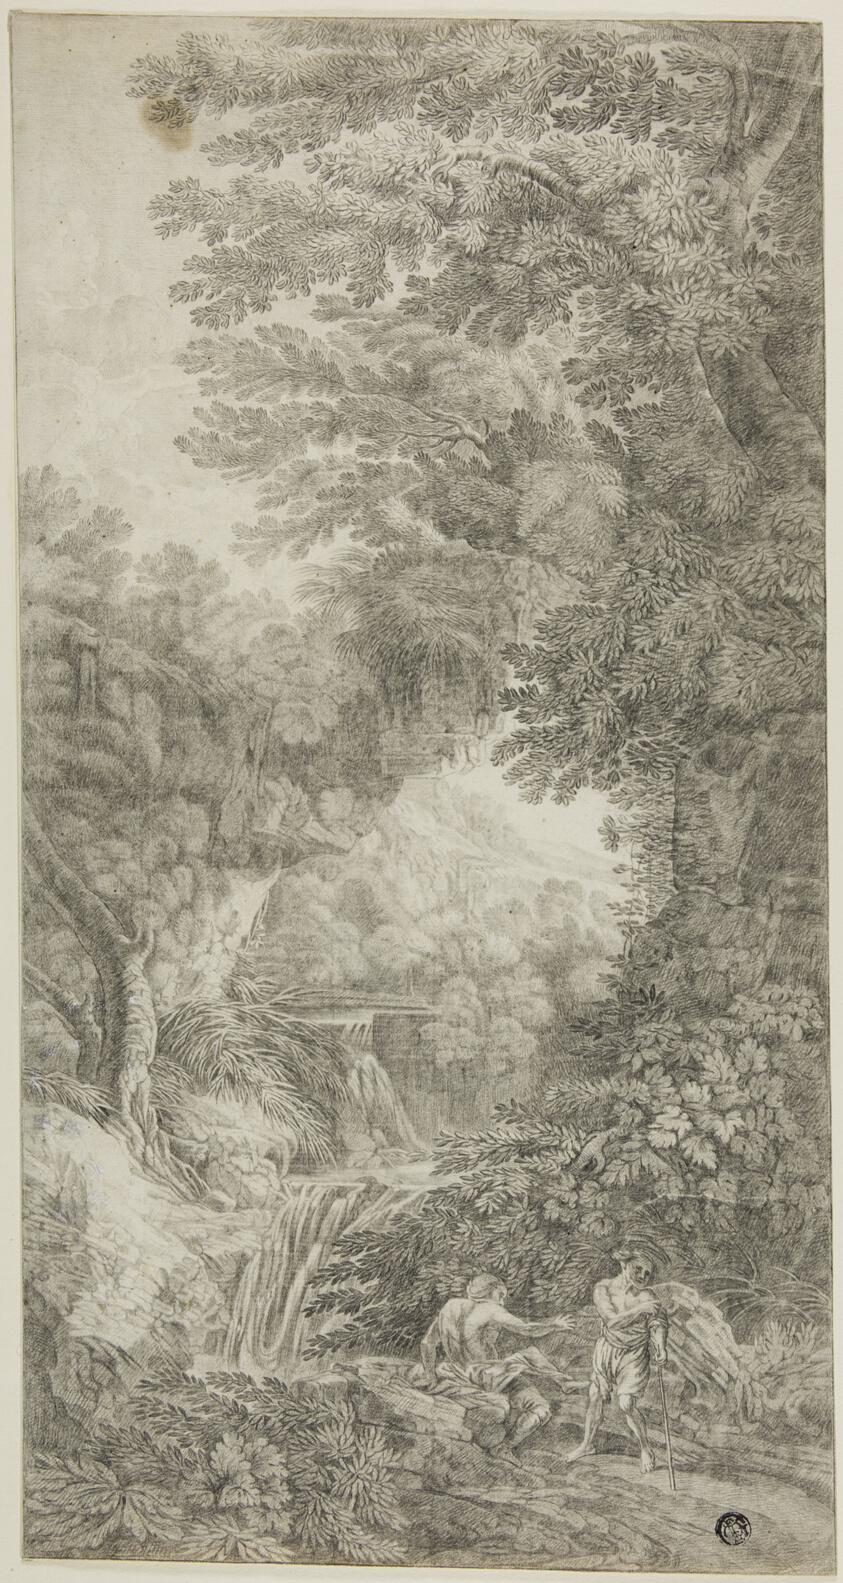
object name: Drawing and Watercolor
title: Forest Scene with Waterfall and Two Figures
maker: Attributed to Johann Samuel Bach; German, 1749-1778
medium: Black chalk on ivory laid paper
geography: Germany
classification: graphite; drawings (visual works); prints and drawing